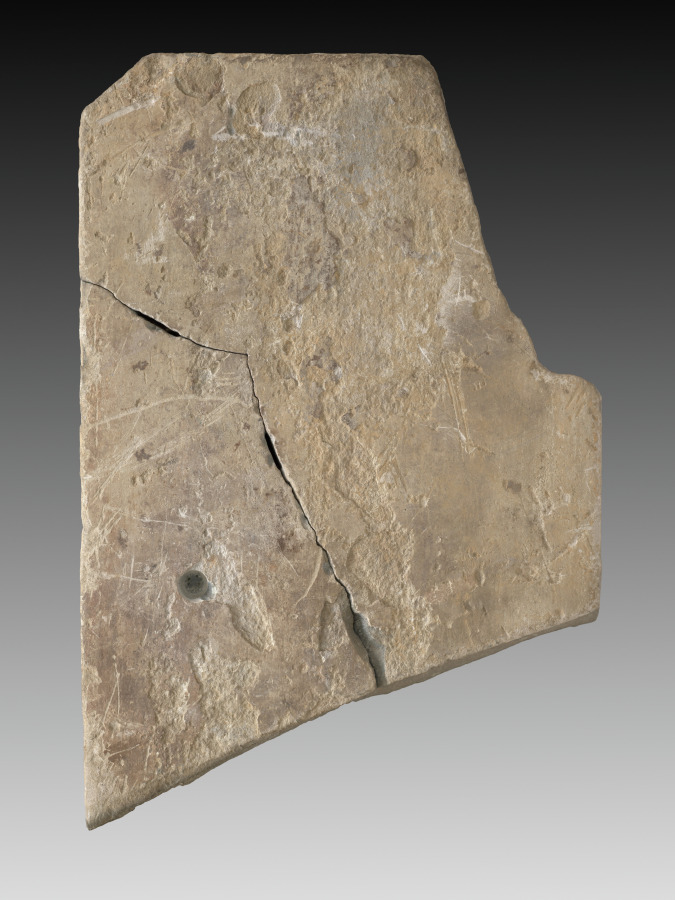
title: Upper stele with hand for Krishna Lifting Mount Govardhan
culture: Southern Cambodia, Takeo Province, Phnom Da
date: c. 600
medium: Sandstone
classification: Sculpture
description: This masterwork of early Cambodian sculpture shows the Hindu god Krishna effortlessly holding aloft a mountain to protect his fellow villagers and herds from torrential storms sent by a jealous old god. It is one of eight monumental monolithic figures recovered from a two-peaked mountain in the floodplains of the Mekong River delta, on the outskirts of the ancient urban center of Angkor Borei.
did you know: Gold earrings were once fastened to the sculpture using holes in the figure's earlobes.